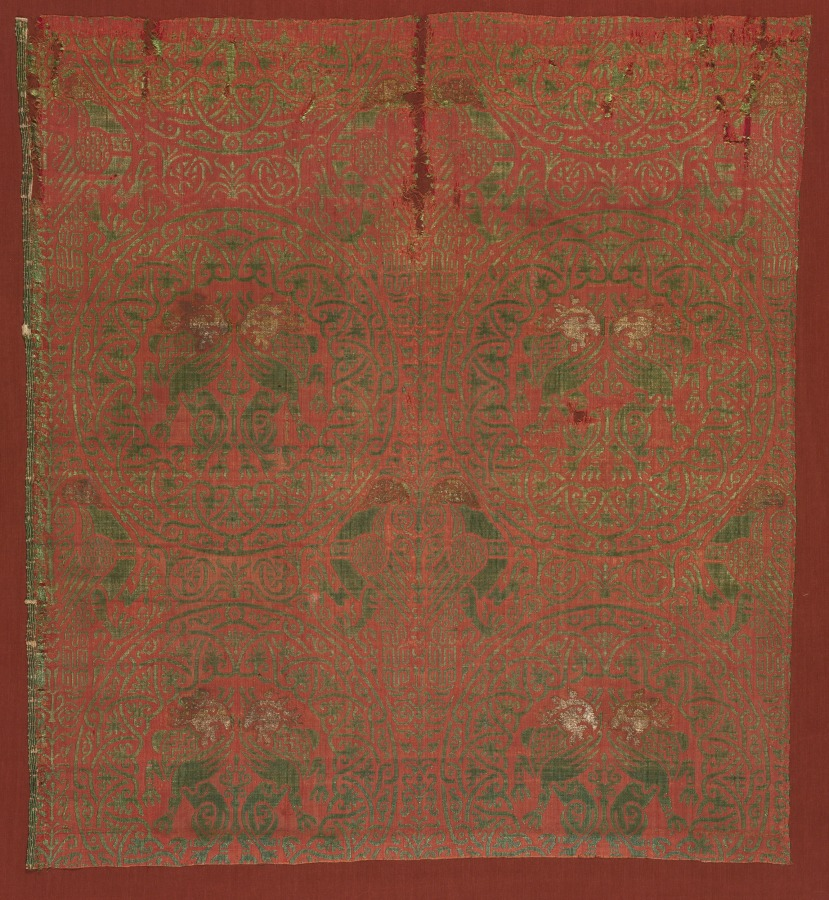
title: Silk Fragments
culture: Spain, Islamic period or Mudejar, 13th century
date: 1200s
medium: lampas weave, brocaded; silk and gold thread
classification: Textile